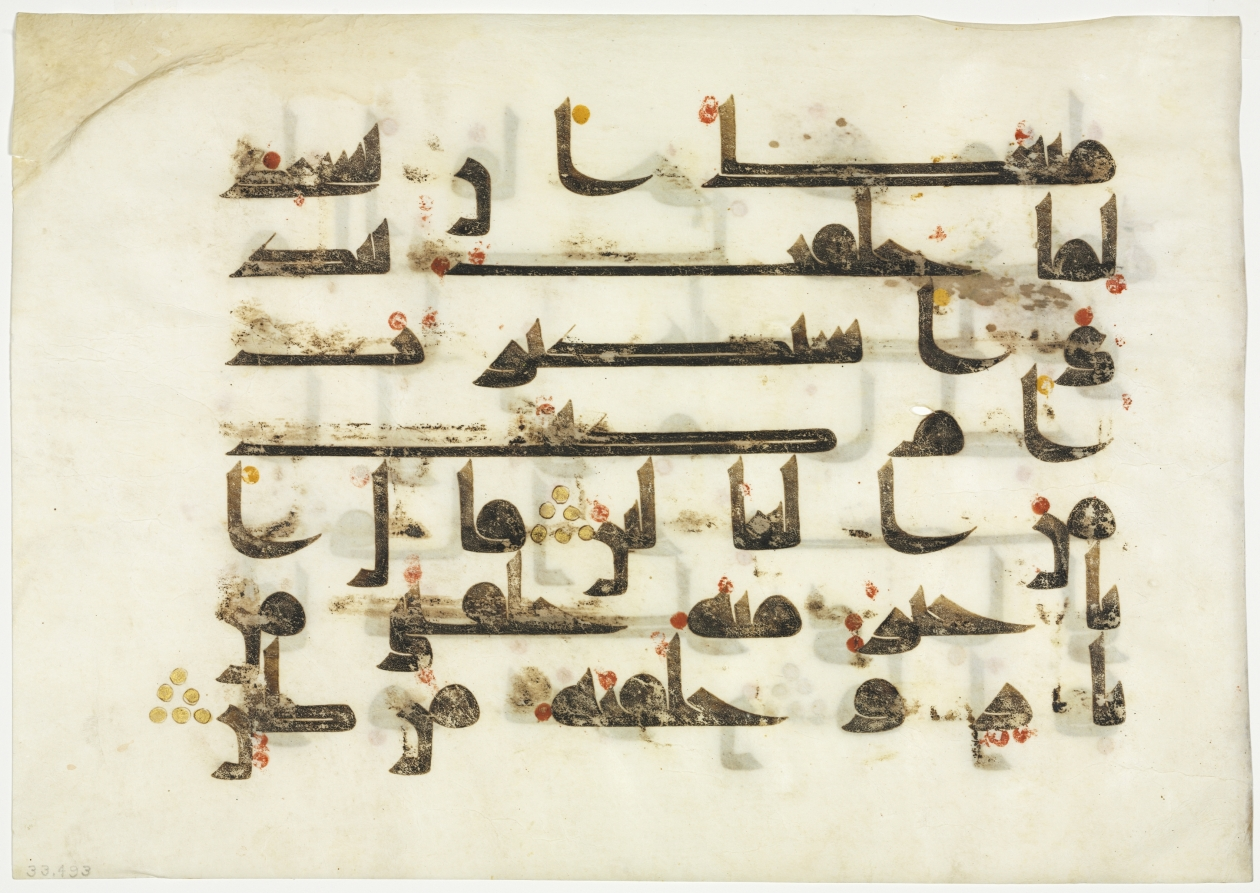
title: Folio from a Qur'an (recto)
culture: Probably Egypt, Abbasid period (750–1258)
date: 800s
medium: Opaque watercolor, ink, and gold on parchment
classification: Drawing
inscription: Sura al-Saad (38: 77-part 75-76). Script: Kufi (seven lines to a page)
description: The sacred book of Islam, the Qur'an is believed by Muslims to be a literal transcription of the word of God, spoken in Arabic to the Prophet Muhammad (died 632). In order to convey the importance of the divine word, Arabic calligraphy—sometimes highly elaborate and embellished with gold—was used to create copies of the Qur'an. This folio was written in the oldest style of Arabic calligraphy, called Kufic script, used in earliest surviving copies of the Qur'an. The wide format of the page is well suited to this style of Kufic that has elongated, horizontal strokes. Vowels are indicated by red dots, and the triangles of gold dots mark the end of each verse. The text on the recto recounts an argument between God and Lucifer. Proud Lucifer declares himself superior to humans because he was formed from fire, while humans were molded from clay. In the verses on the verso, God casts Lucifer out of heaven as punishment for his pride.